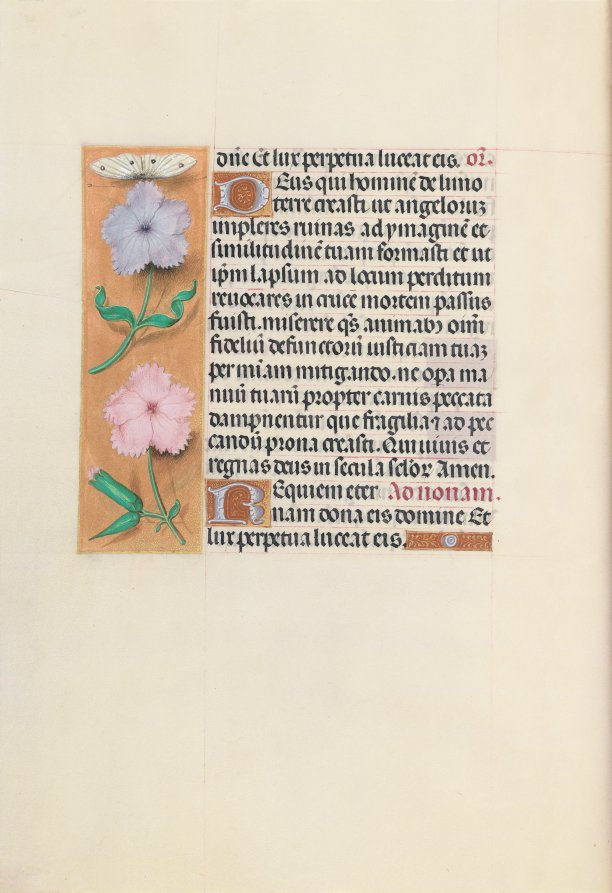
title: Hours of Queen Isabella the Catholic, Queen of Spain: Fol. 27v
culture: Flanders, Ghent and Bruges, late 15th century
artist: Master of the First Prayerbook of Maximillian (Flemish, c. 1444–1519)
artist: and Associates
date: c. 1500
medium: ink, tempera, and gold on vellum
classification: Bound Volume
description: A great lover of Flemish art, Queen Isabella treasured her many devotional books. This deluxe manuscript was created for her private devotions by highly organized and distinctly talented manuscript painters active in Ghent and Bruges. The Ghent-Bruges school represents the culmination of Flemish book painting, whose main features were the use of rich colors, illusionistic effects, a love of landscape, and a strong sense of visual narrative. Manuscripts produced by this circle of artists are renowned for their border decoration featuring a rich variety of realistically painted flowers, scrolling acanthus leaves, birds, and butterflies.